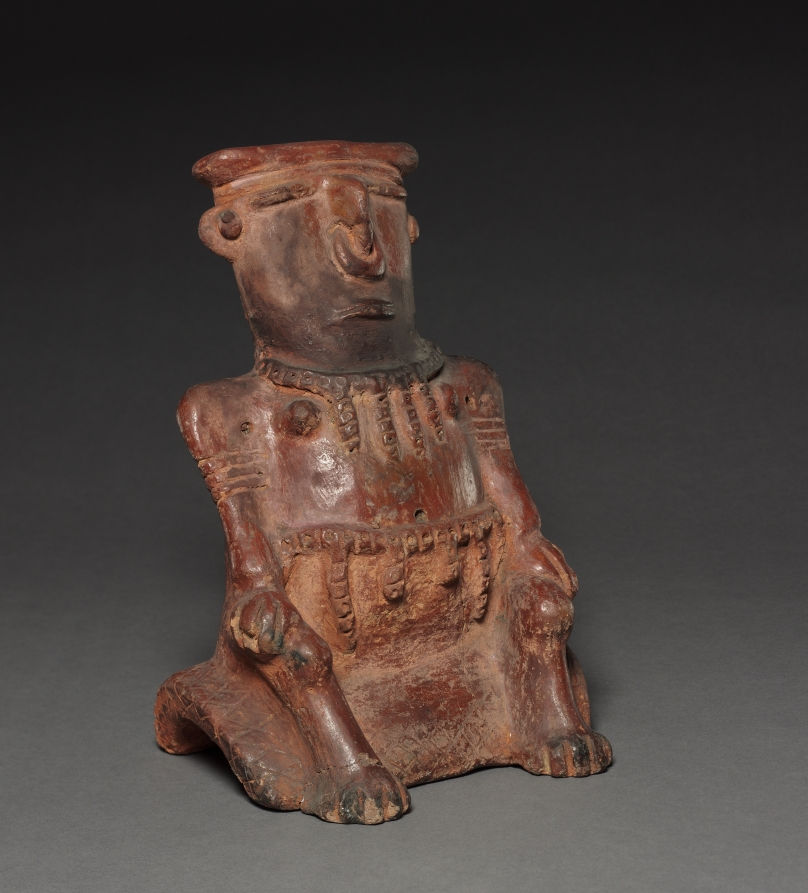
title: Seated Figure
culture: Colombia, 19th-20th century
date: before 1921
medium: red ware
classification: Ceramic